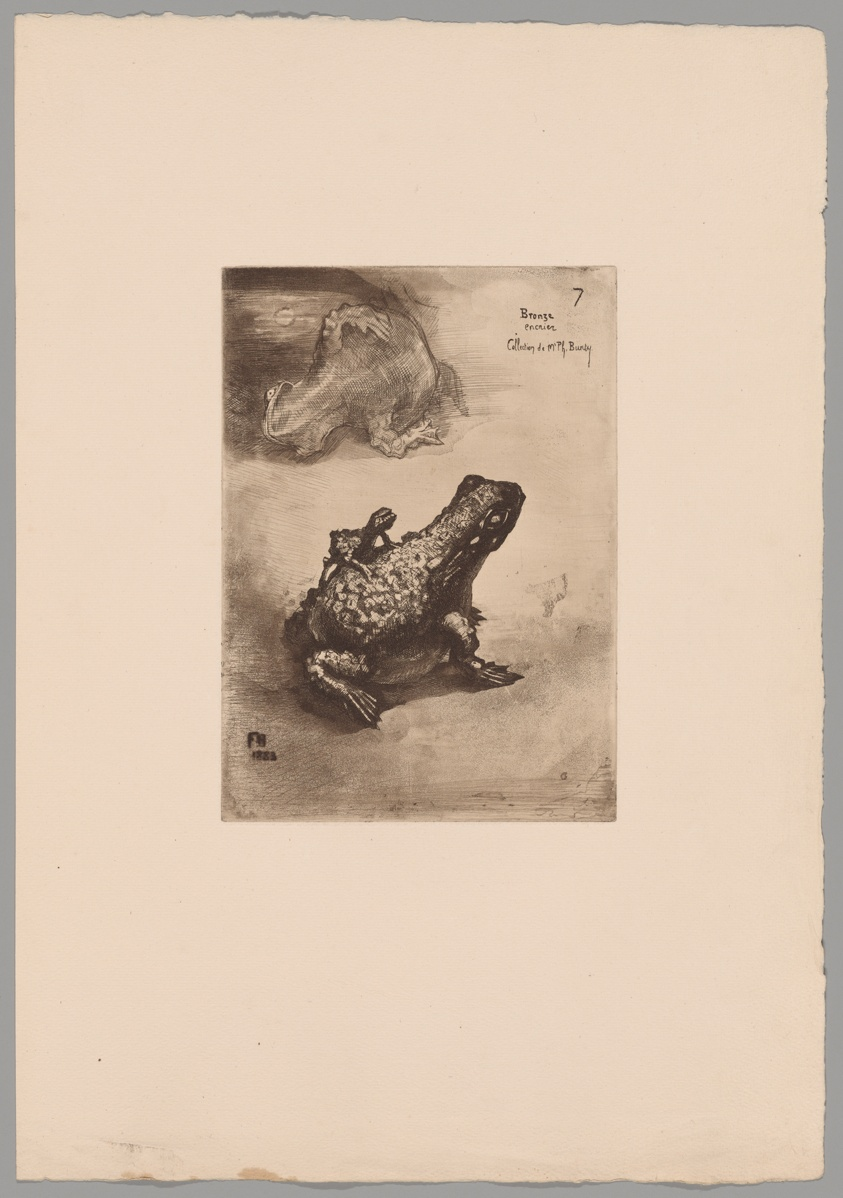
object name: Print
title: Japonisme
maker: Felix Hilaire Buhot; French, 1847-1898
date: 1883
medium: Etching and aquatint in brown ink on cream laid paper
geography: France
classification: prints and drawing; etching; paper; print